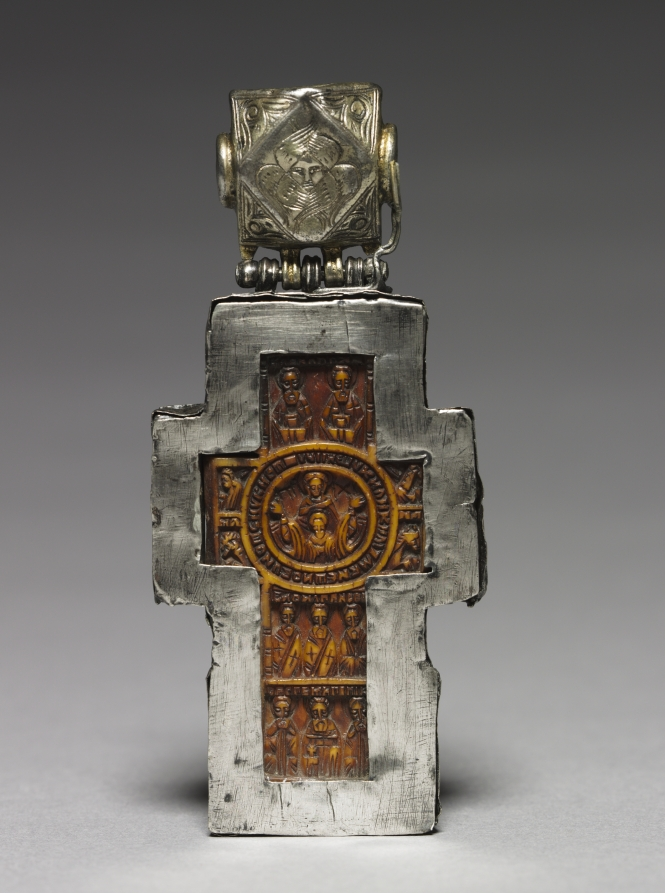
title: Pectoral Cross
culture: Byzantium, Russia, Byzantine period, 17th century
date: 1600s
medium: walrus ivory, wood, partially gilt silver and pearls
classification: Ivory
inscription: Slavonic inscriptions on obverse and reverse.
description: This ivory cross is carved on the front with scenes drawn from Twelve Feasts of the Orthodox Church, including the Passion and Resurrection of Christ; on the reverse is a scene of the Mother of God surrounded by clergy. The scenes include Slavonic inscriptions. The ivory cross is mounted within a silver frame as a pectoral to be worn at the breast, probably by a priest.